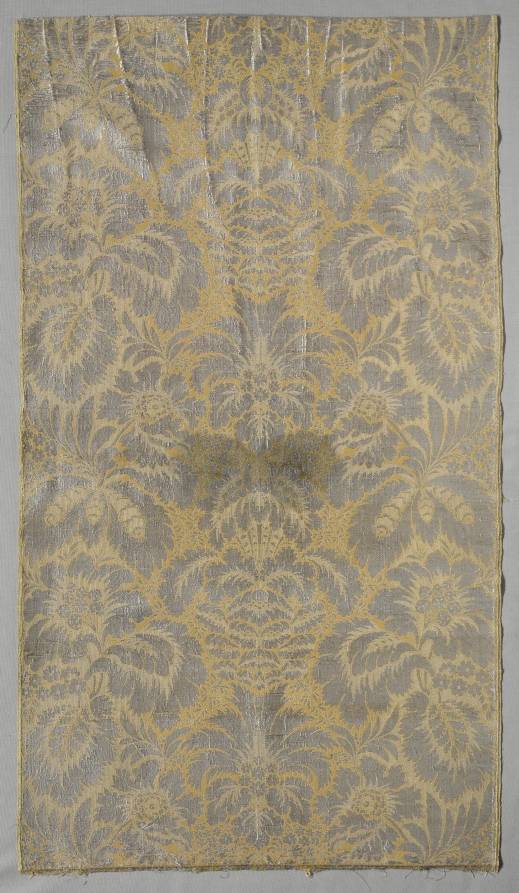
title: Length of Textile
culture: France, Lyon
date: c. 1700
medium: lampas weave; silk and silver thread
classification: Textile